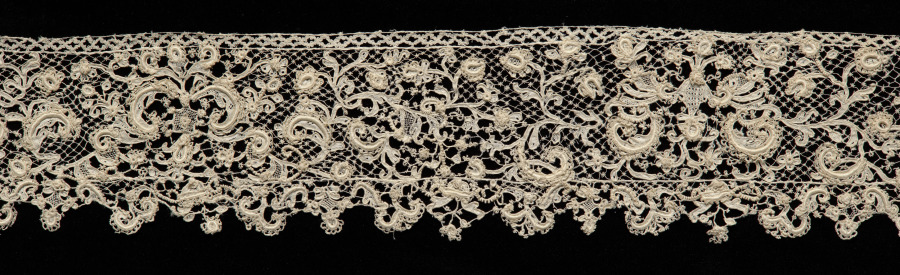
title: Lace Edging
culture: France or Italy(?)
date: 1660–1799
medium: Needle lace (Venetian Rose Point or variation of) and bobbin lace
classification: Lace